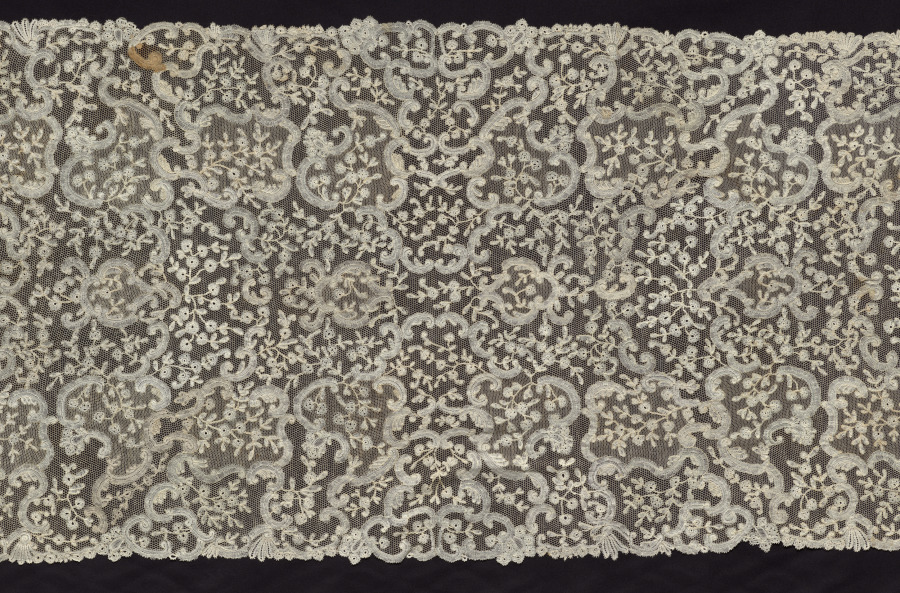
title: Lace Panel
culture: Probably Belgium, Brussels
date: 1800s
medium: linen: Duchesse(?) bobbin lace with plaited ground joining motifs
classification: Lace